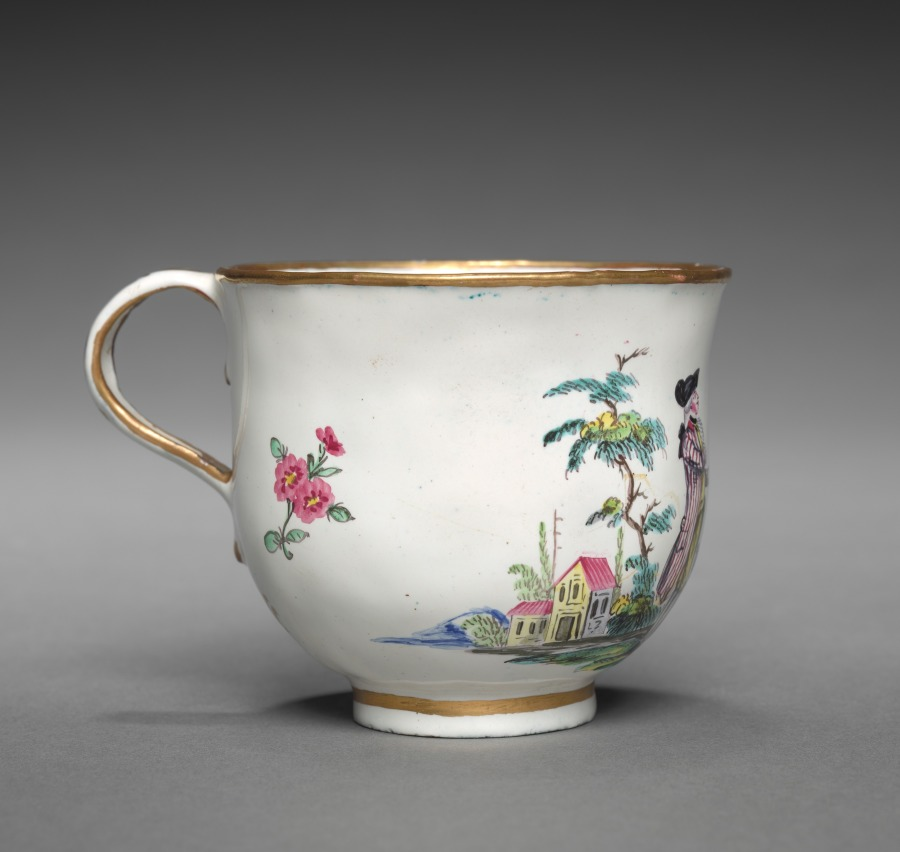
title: Cup and Saucer: Cup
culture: England, mid-18th Century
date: mid-18th century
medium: enamel on metal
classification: Enamel